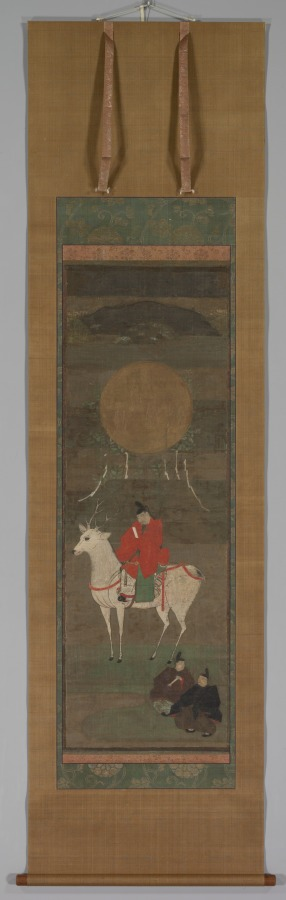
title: Departure from Kashima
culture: Japan, Nanbokuchō period (1336–92)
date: 1336–92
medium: hanging scroll; ink and color on silk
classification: Painting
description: The kami Takemikazuchi from Kashima (in present-day Ibaraki Prefecture) departs on a white deer for Mount Mikasa in Nara, where he takes up residence. The five Kasuga kami are presented within a golden circle supported by the branches of a sakaki tree, from which trail five white paper streamers—indicating the purity and sacredness of the five shrine halls of the complex—as well as blossoming wisteria vines, a symbol of the Fujiwara family. The two figures walking along near the stag’s back legs are Nakatomi no Tokifū and his younger brother Hidetsura, who have followed Takemikazuchi and become priests of Kasuga Taisha.